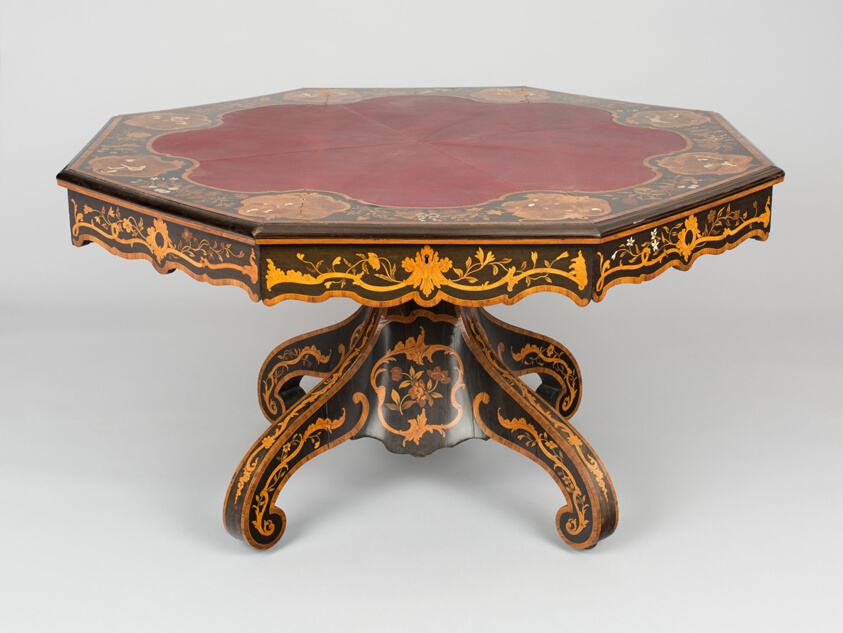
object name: Furniture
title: Octagonal Library Table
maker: Attributed to Richard Hicks Bridgens; English, 1785-1846; Made by Edward Holmes Baldock; English, 1777-1845; London, England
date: c. 1840; designed 1832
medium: Ebony, boxwood, kingwood, mahogany, satinwood, pine, cedar, chestnut, tulipwood, and various stained and shaded woods, with ivory, pearl-shell, copper and brass inlay; the carcass of the top and of the drawer linings is mahogany; the carcass of the base pedestal is pine; replacement leather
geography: London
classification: table; furniture; european decorative arts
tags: furniture